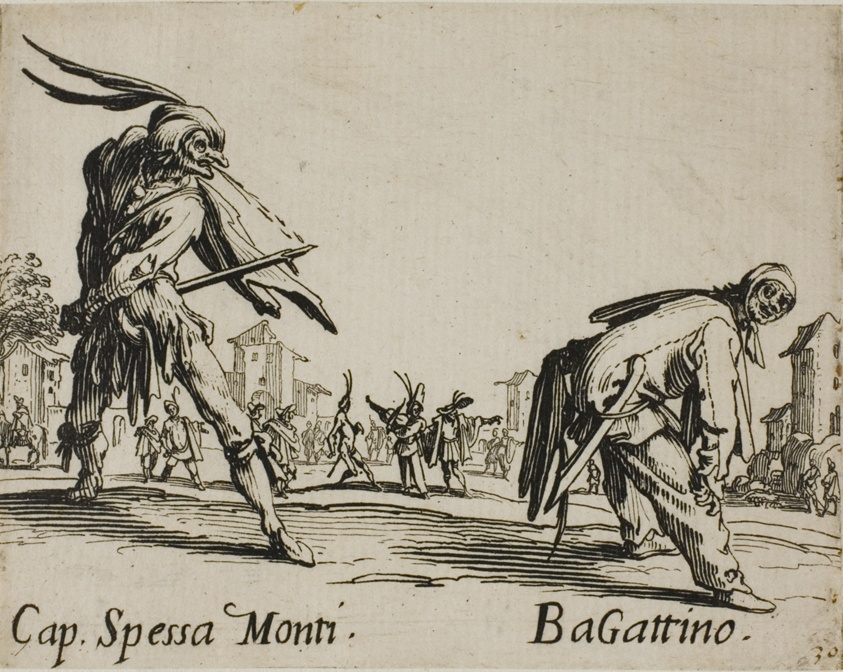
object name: Print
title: Capitan Spessa Monti - Begattino, plate 10 from Balli di Sfessania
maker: Jacques Callot (French, 1592-1635)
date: c. 1622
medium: Etching and engraving on paper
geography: France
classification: etching; print; prints and drawing